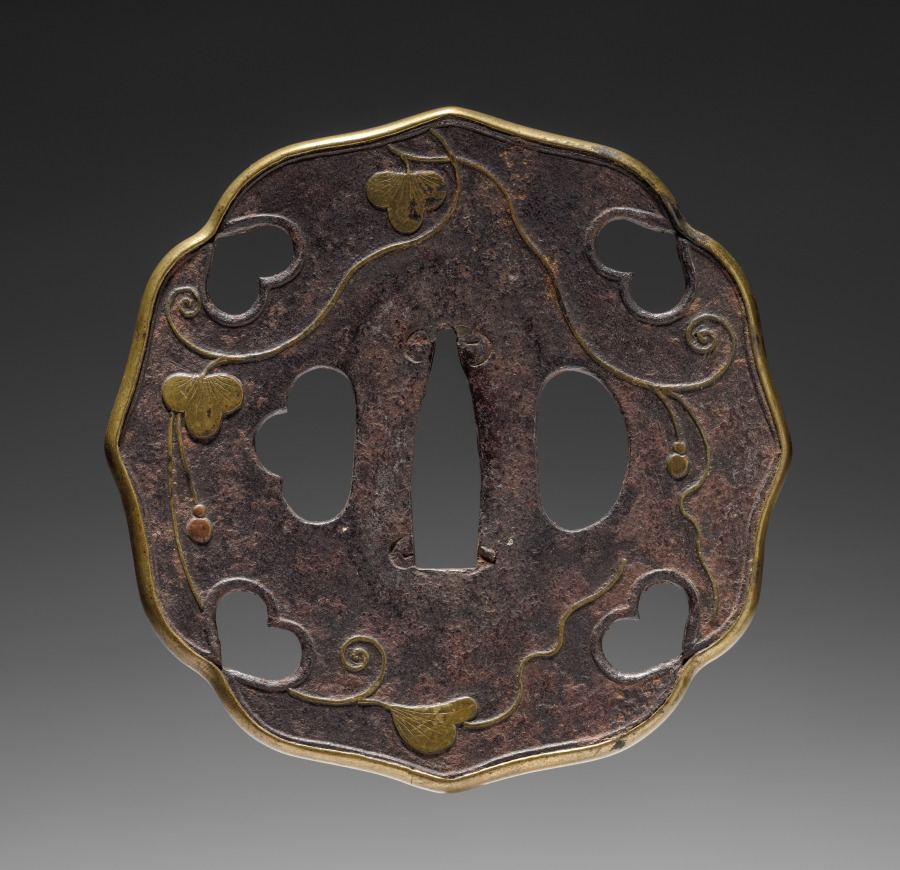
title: Sword Guard (Tsuba)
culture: Japan, possibly Edo period (1615-1868)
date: c. 1615–1868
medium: iron with brass bound edge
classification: Arms and Armor